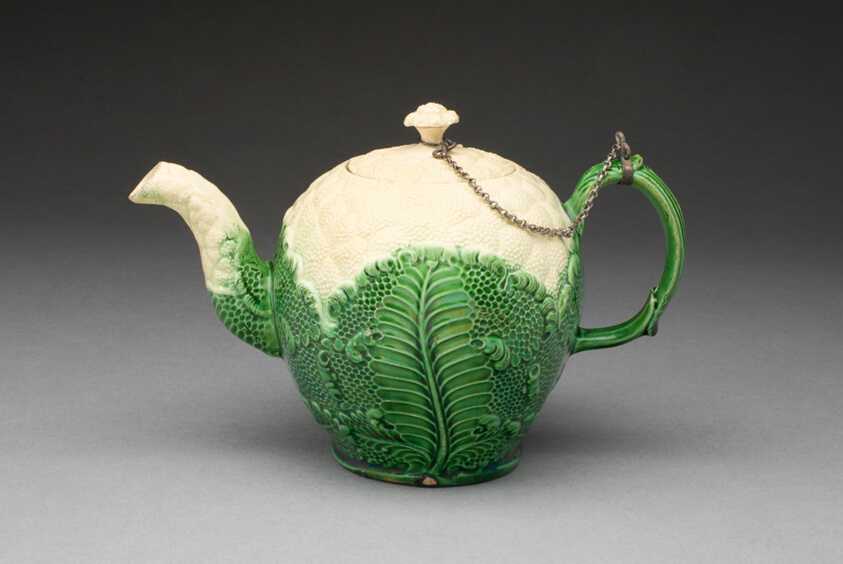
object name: Ceramics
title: Teapot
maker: England, Staffordshire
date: 1765–80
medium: Lead-glazed earthenware (creamware)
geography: Staffordshire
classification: teapot; earthenware; ceramics; european decorative arts; creamware; lead-glazed earthenware